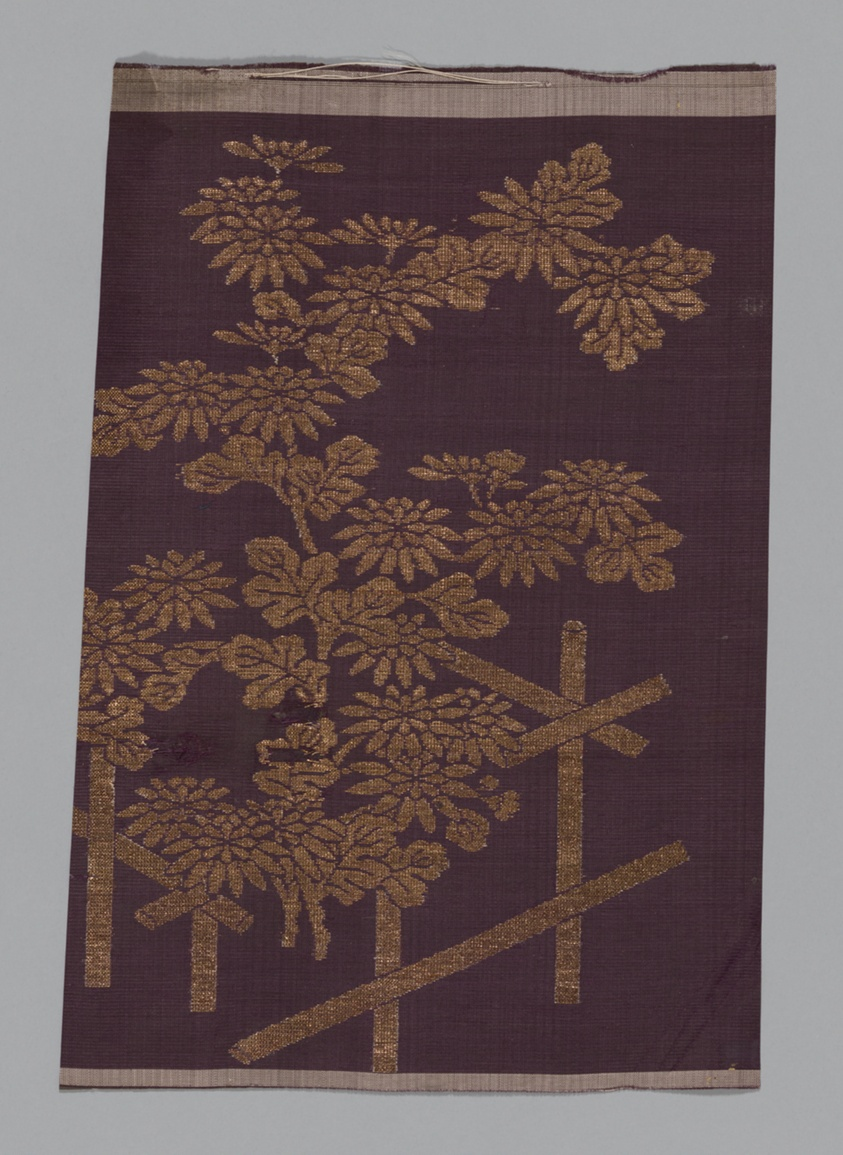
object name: Textile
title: Fragment (From a Choken of Noh Costume)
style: edo (japanese period)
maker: Japan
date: Edo period (1615–1868), 1775/1825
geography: Japan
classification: textile; weaving